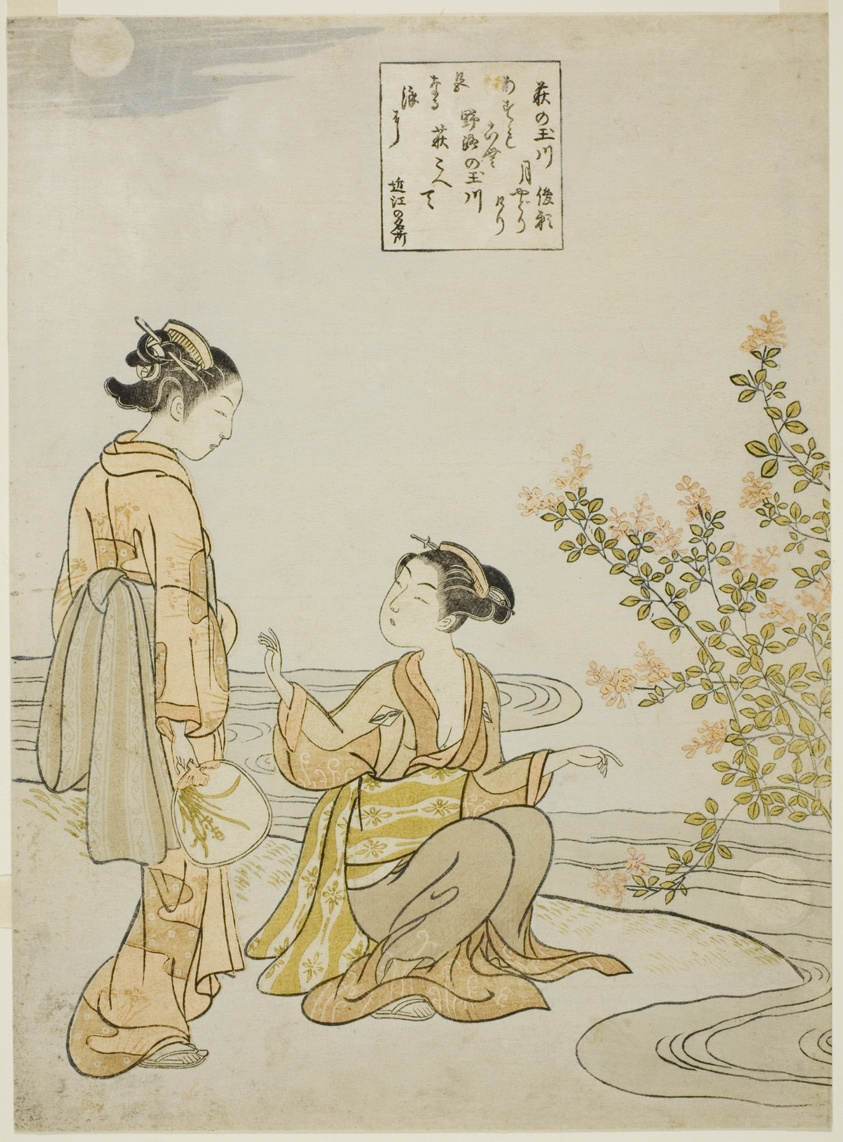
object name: Print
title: The Jewel River of Bush Clovers (Hagi no Tamagawa), from an untitled series of Six Jewel Rivers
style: Japanese (culture or style)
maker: Suzuki Harunobu 鈴木 春信; Japanese, 1725 (?)-1770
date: c. 1767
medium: Color woodblock print; chuban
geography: Japan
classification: woodblock print; print; asian art